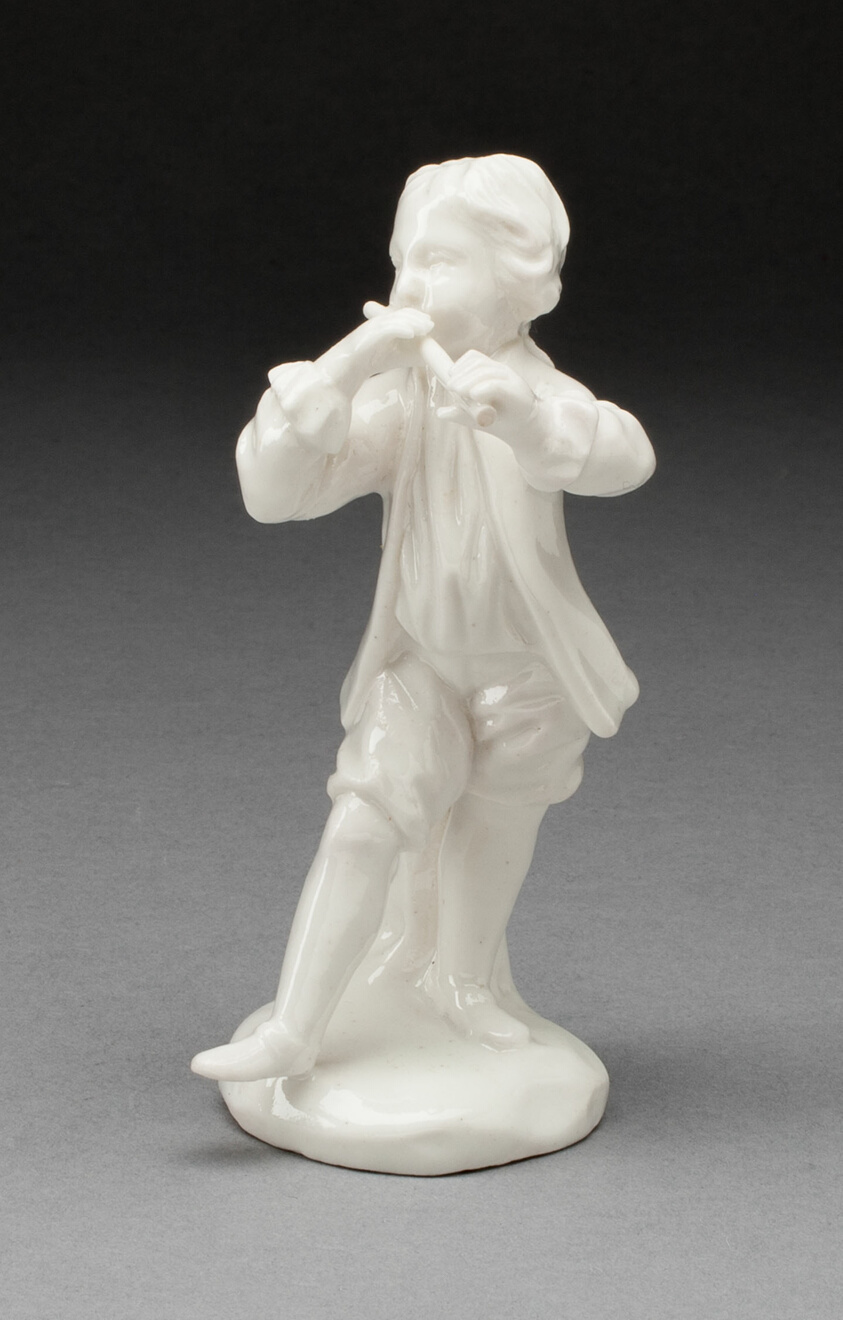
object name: Ceramics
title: Boy Playing Flute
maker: Tournai Porcelain Manufactory (Belgian, c. 1750-1798)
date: c. 1770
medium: Soft-paste porcelain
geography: Tournai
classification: sculpture; ceramics; porcelain; european decorative arts